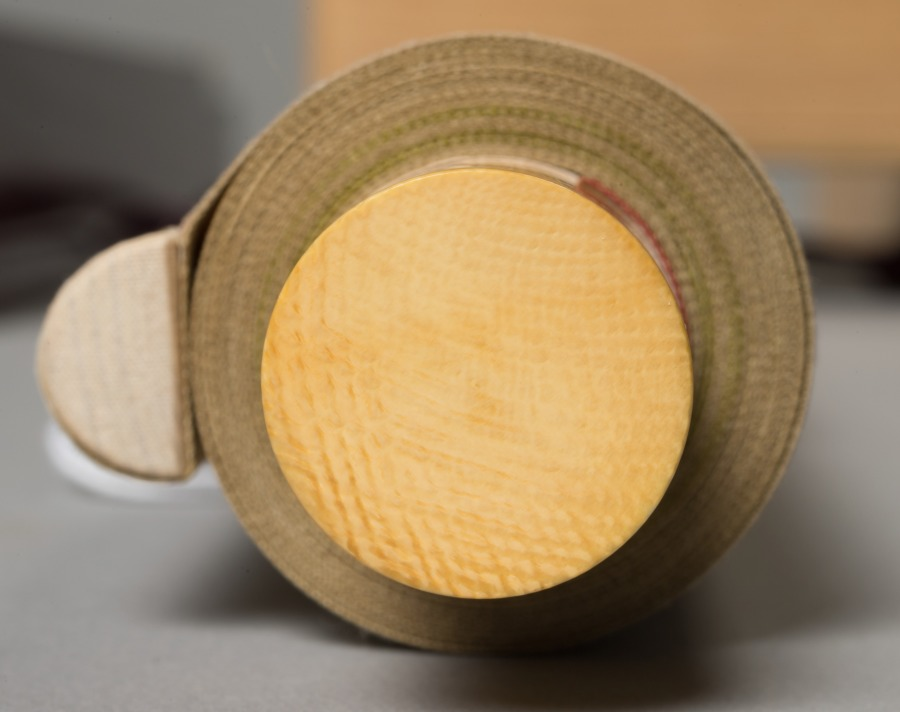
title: Two Beauties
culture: Japan, Edo period (1615–1868)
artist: Kitao Shigemasa (Japanese, 1739–1819)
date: late 1700s–early 1800s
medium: hanging scroll, pillar painting: ink and color on silk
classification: Painting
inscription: Artist's signature and seal, lower right corner. Poem inscribed on upper section of scroll.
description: Shigemasa favored using colors in broad opaque masses, as seen here in the beauties’ robes. He was a painter, printmaker, and poet, specializing in courtesan and actor prints. The format of this hanging scroll or "pillar painting" allows for the work to be hung on a pillar in a Japanese home.